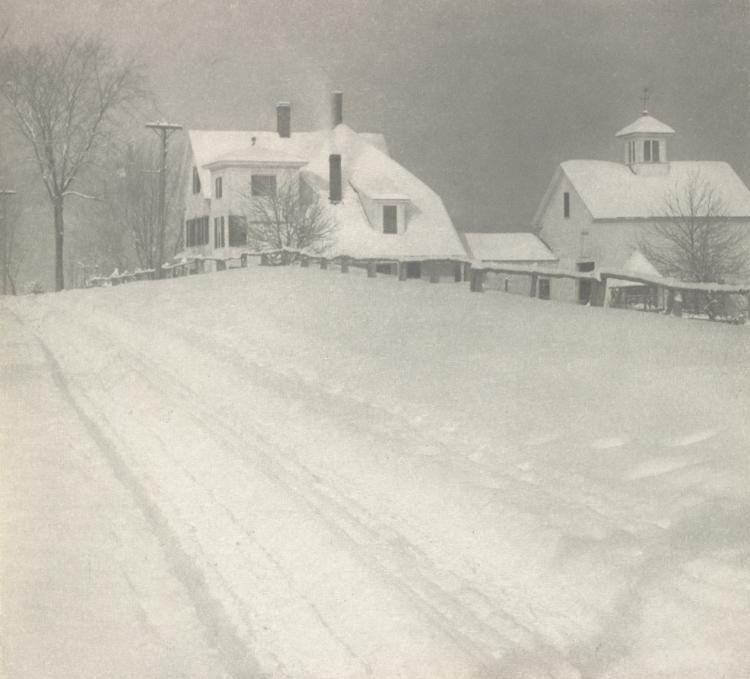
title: Camera Work: Wintry Weather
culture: America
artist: William B. Post (American, 1857–1925)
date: 1904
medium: photogravure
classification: Bound Volume